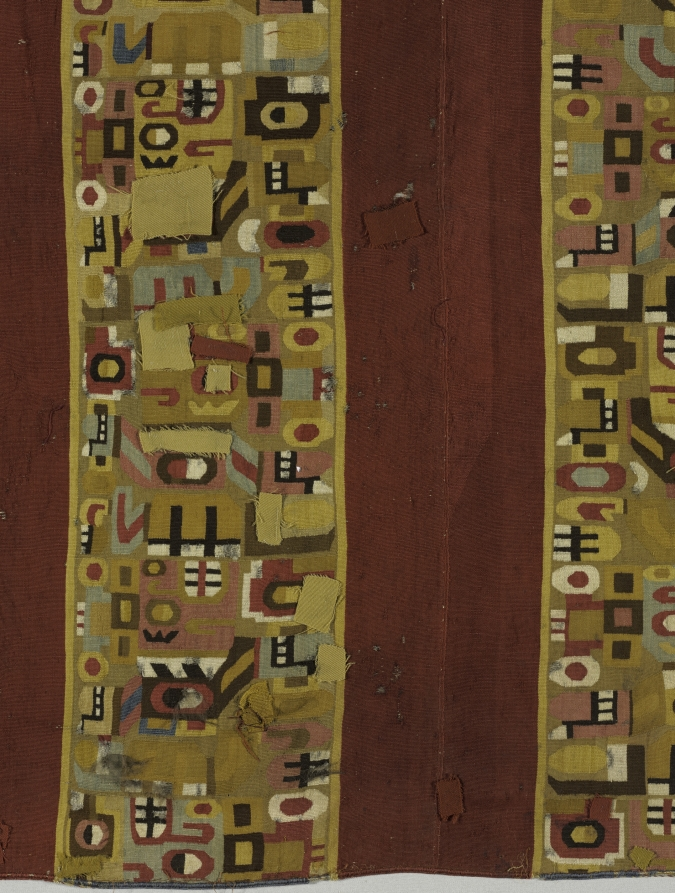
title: Tunic with Sacrificer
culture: South America, Peru, Central Andes, Middle Horizon, Wari people, 7th-11th century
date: 600–1000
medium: camelid-fiber, cotton; tapestry weave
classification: Textile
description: An extremely abstract supernatural sacrifice repeats in different colors and orientations across the body of this tunic, which was shortened on one side in antiquity. Look for the toothy black-and-white mouth in the sacrificer's upward-gazing head; other facial features include a button nose and a vertically divided eye. The figure holds the L-shaped haft of an axe behind its back and, at the front of its body, a short staff with a severed, upside-down human head on the top.